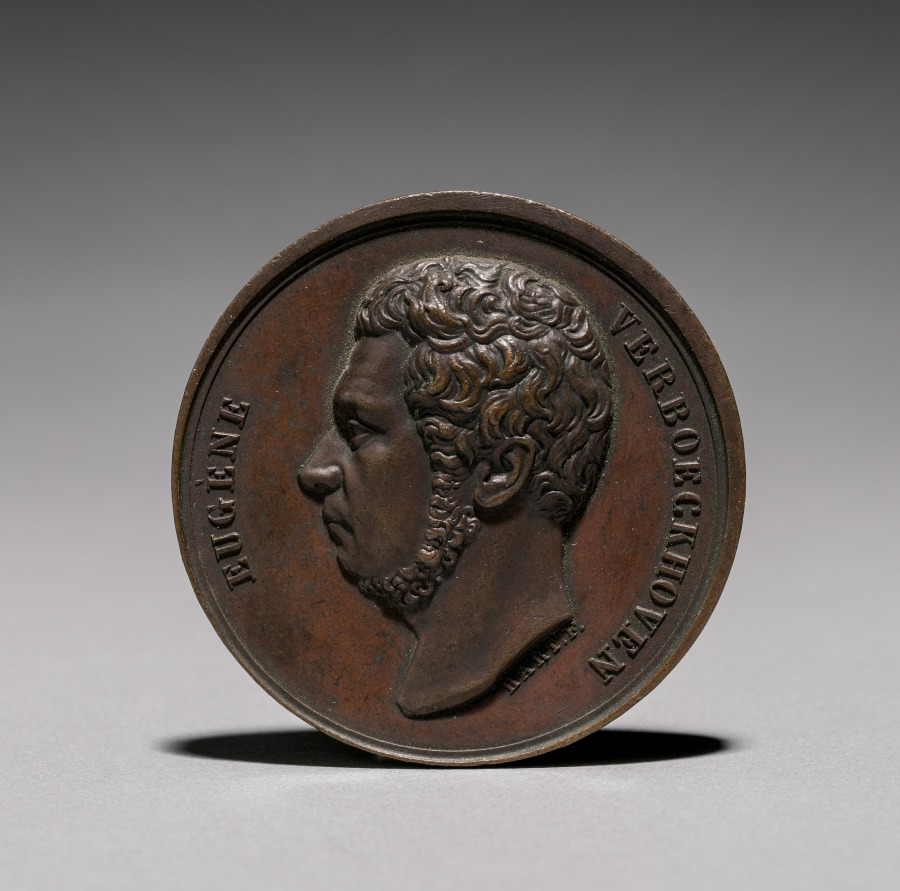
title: Medal: Eugene Verboeckhoven (obverse)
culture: 19th century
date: 1800s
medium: bronze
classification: Metalwork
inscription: "EUGENE VERBOECKHOVEN"; signed: "Hart. F."